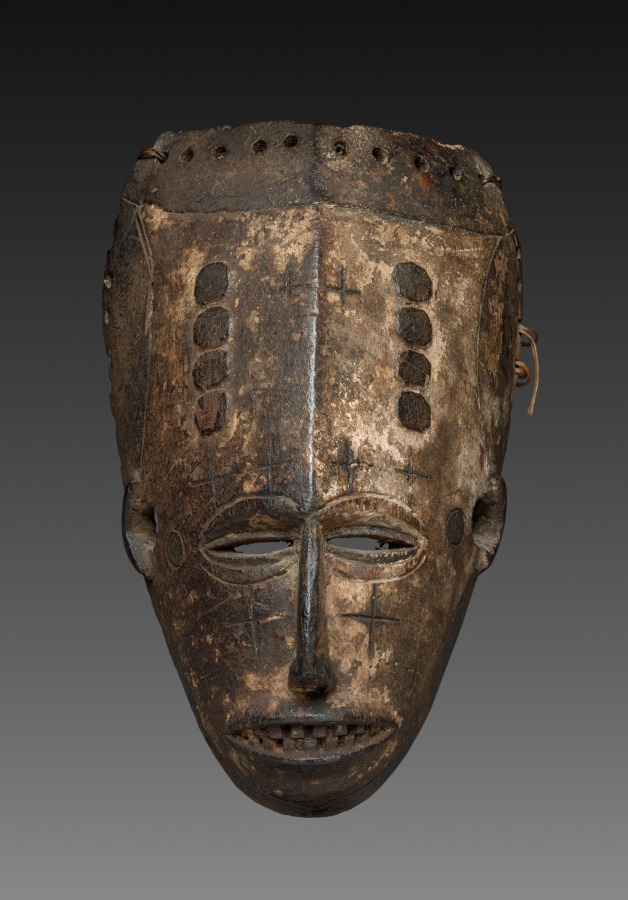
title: Face Mask (Agboho mmuo)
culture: Africa, West Africa, Nigeria, Igbo-style maker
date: possibly early 1900s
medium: Wood, pigment, plant fiber, and cotton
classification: Mask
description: This small face mask would have been complemented by a separate, elaborate superstructure covered with cotton cloth. Though always worn by a man, the image glorifies youthful female beauty. Derived from chalky clay, the white coloration of the face refers to ancestral spirits whose powers the mask evokes. The masks dance in festivals that generally celebrate the dead but also appear at funerals to escort the deceased to the land of the ancestors.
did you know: Though always worn by a man, the imagery of this mask celebrates youthful female beauty.